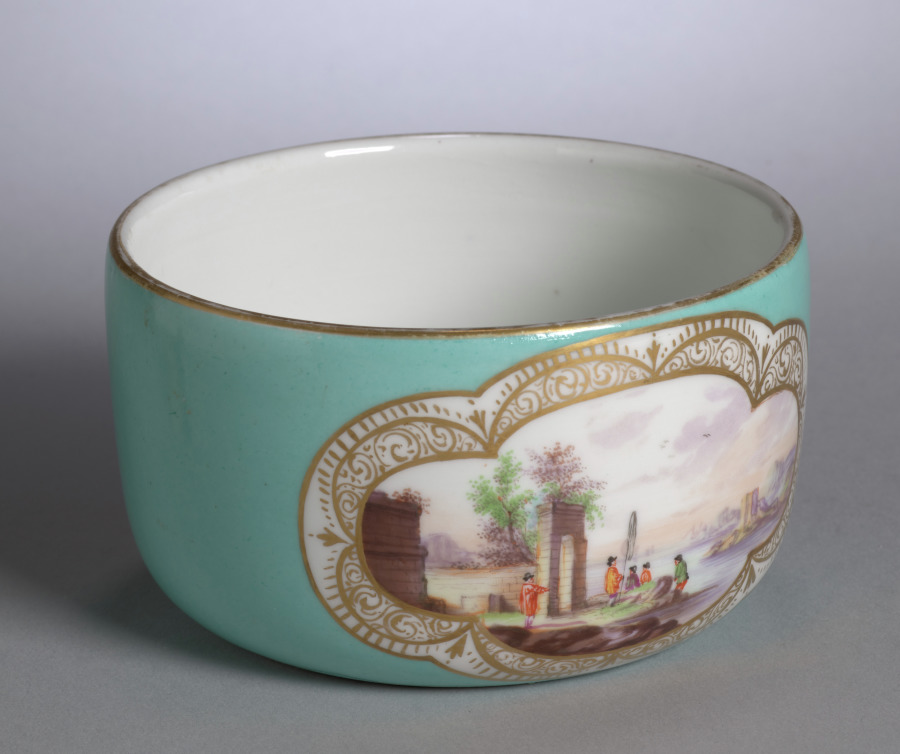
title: Bowl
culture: Germany, Meissen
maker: Meissen Porcelain Factory (German, est. c. 1710)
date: c. 1750–70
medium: porcelain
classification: Ceramic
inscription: Half moon mark on the bottom.